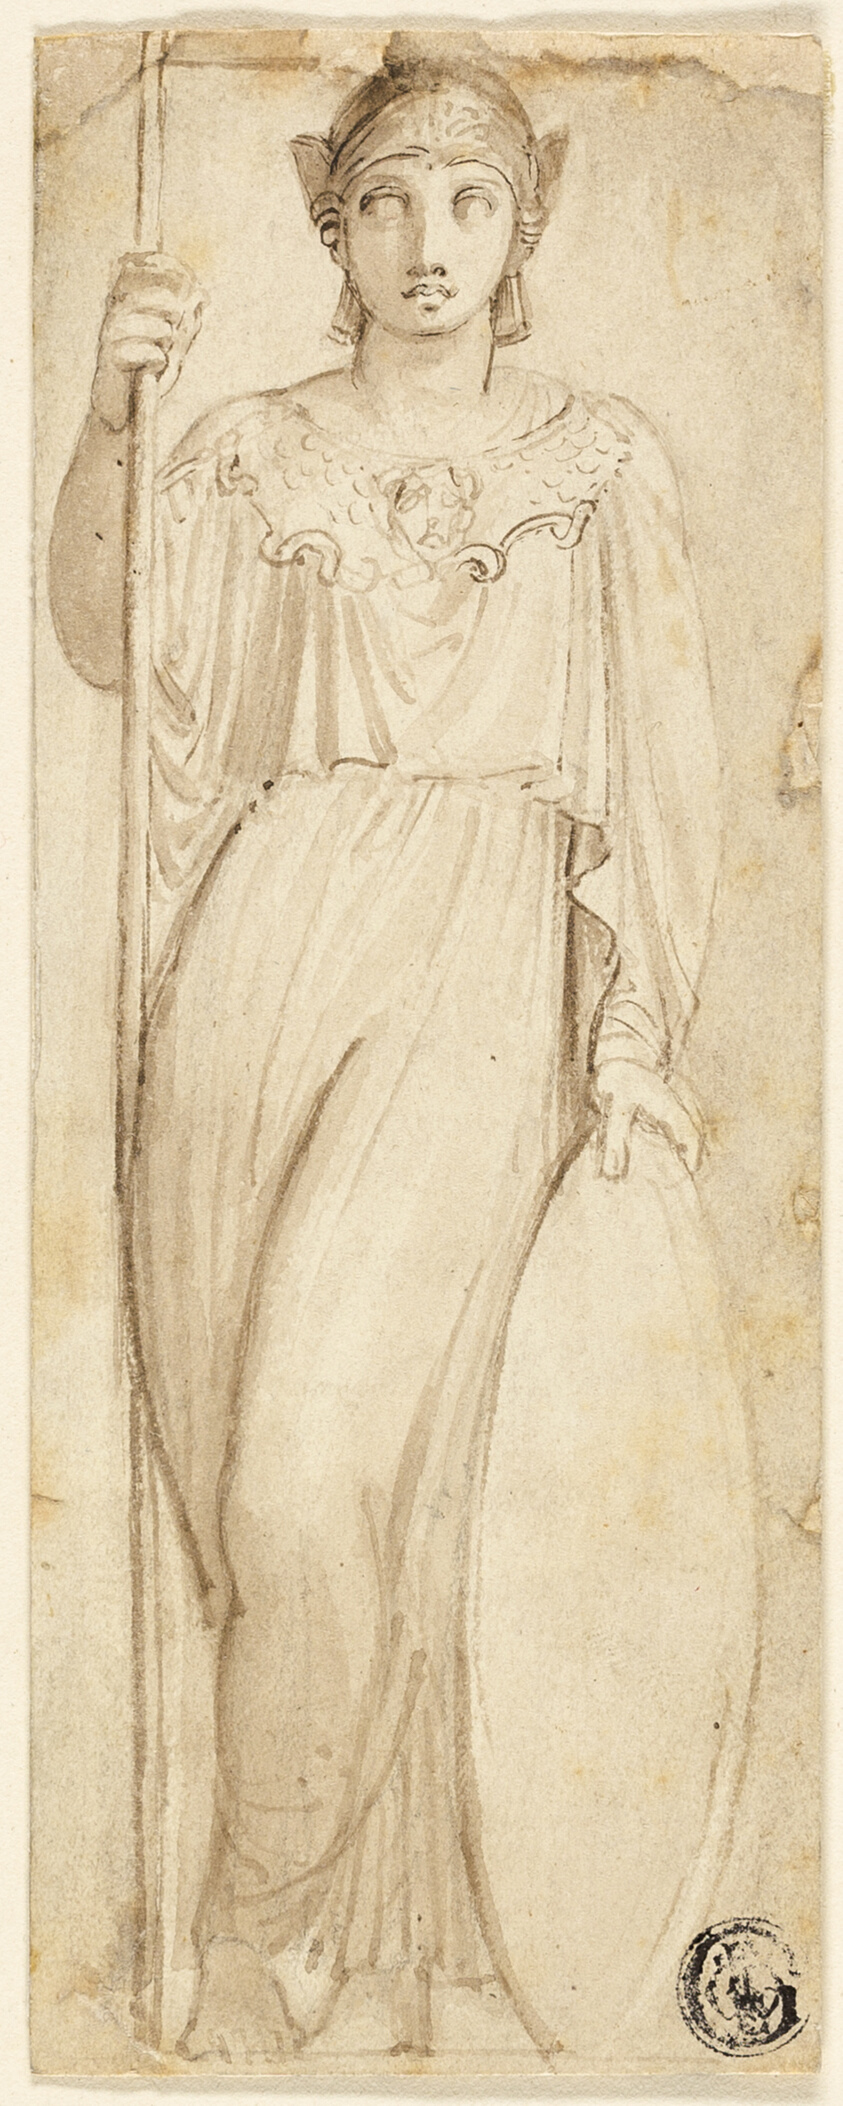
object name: Drawing and Watercolor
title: Athena, or Britannia identified as Athena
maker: Attributed to Thomas Stothard; English, 1755-1834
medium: Pen and brown ink with brush and brown wash, over traces of graphite, on ivory wove paper, laid down on cream wove paper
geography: England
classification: pen and ink drawings; drawings (visual works); prints and drawing